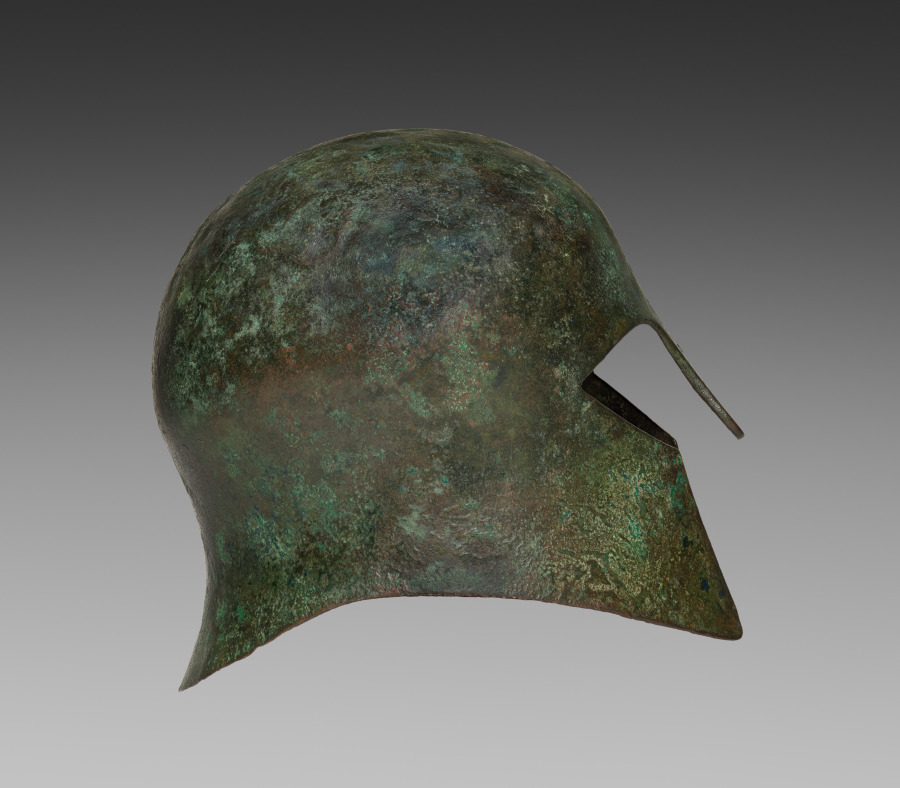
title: Corinthian Helmet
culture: Greek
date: c. 625–550 BCE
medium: Bronze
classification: Arms and Armor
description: This remarkably well-preserved bronze helmet belongs to an iconic type known as Corinthian yet produced far beyond the city of Corinth. Designed for use by hoplite warriors, who fought with spears and shields in shoulder-to-shoulder (phalanx) formation, such helmets provide maximum protection but limited vision, hearing, and movement. Probably first cast and then hammered into its final shape, the helmet features both gentle curves and sharp angles, evoking the head and face that it protected. Similar helmets appear frequently on warriors shown in ancient art, though often with crests of horsehair or other organic materials that no longer survive.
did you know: A small hole above the rear neckline, now repaired, may reflect a fatal blow.